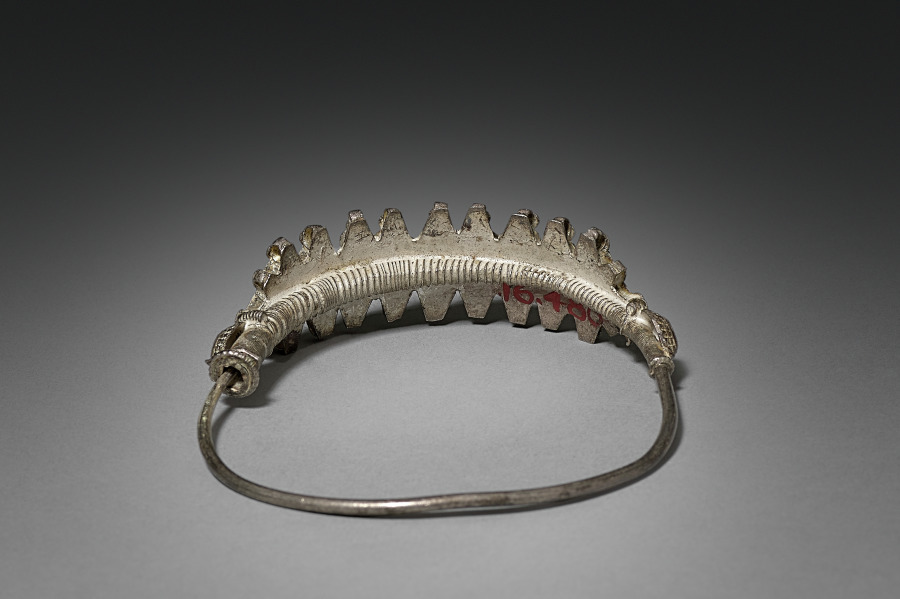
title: Nose Ring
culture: India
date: early 1900s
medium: silver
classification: Jewelry